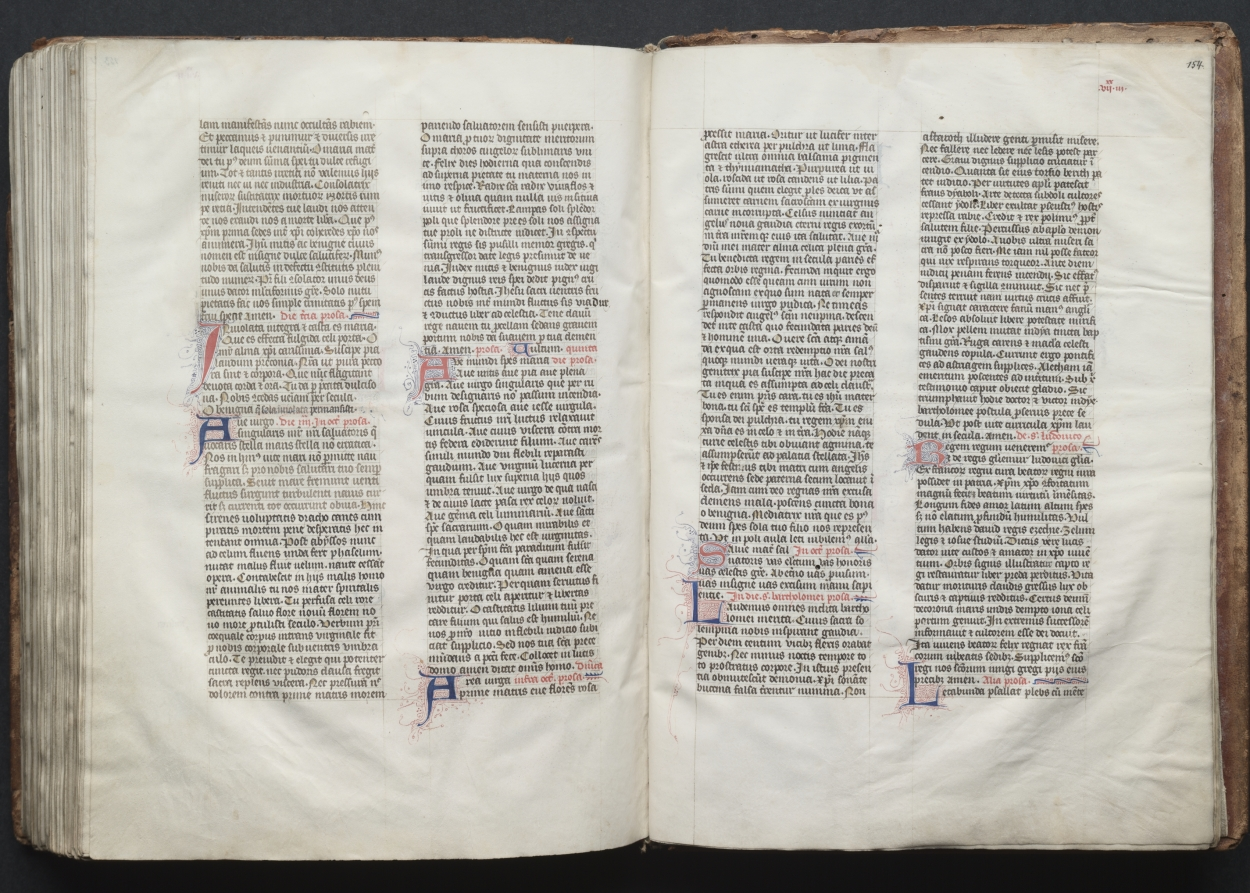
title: The Gotha Missal: Fol. 154r, Text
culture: France, Paris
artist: Master of the Boqueteaux (French)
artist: and Workshop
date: c. 1375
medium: ink, tempera, and gold on vellum; blind-tooled leather binding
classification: Bound Volume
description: The style and quality of this manuscript's decoration is typical of deluxe Parisian books made for aristocratic or royal patrons. Most of the book's decoration appears to be the work of the Master of the Boqueteaux, an artist active at the court of King Charles V (died 1380). His style was apparently shared by a number of book illuminators working in and around Paris. It is very possible that the Gotha Missal belonged to Charles V, but is not provable because the manuscript has no royal portraits and lacks a colophon. Given the book's magnificent decoration, however, it would seem that it was produced for a Valois prince, if not for the king himself. The manuscript receives its name from the German dukes of Gotha, its later owners.